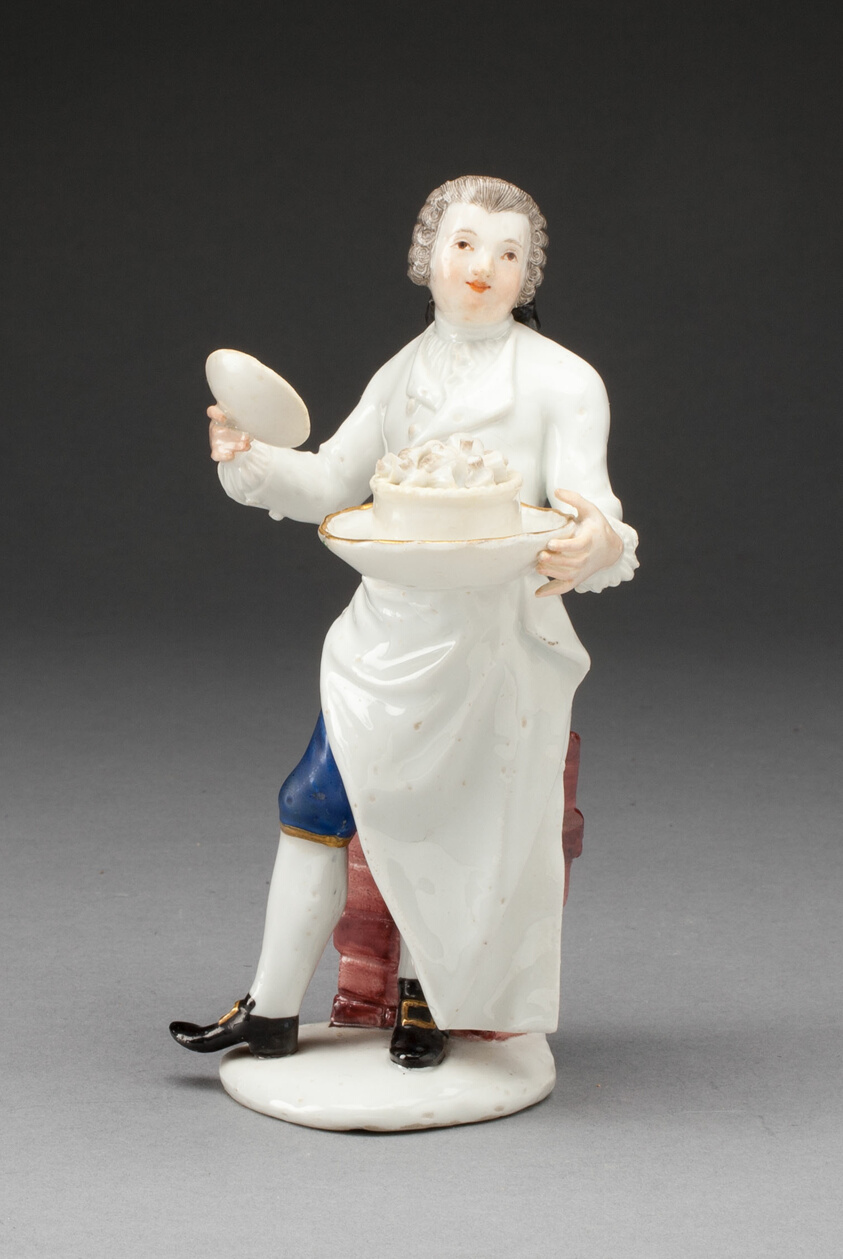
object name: Ceramics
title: Figure of a Cook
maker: Meissen Porcelain Manufactory (German, founded 1710)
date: 1740/55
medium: Hard-paste porcelain and polychrome enamels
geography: Meissen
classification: sculpture; ceramics; porcelain; european decorative arts